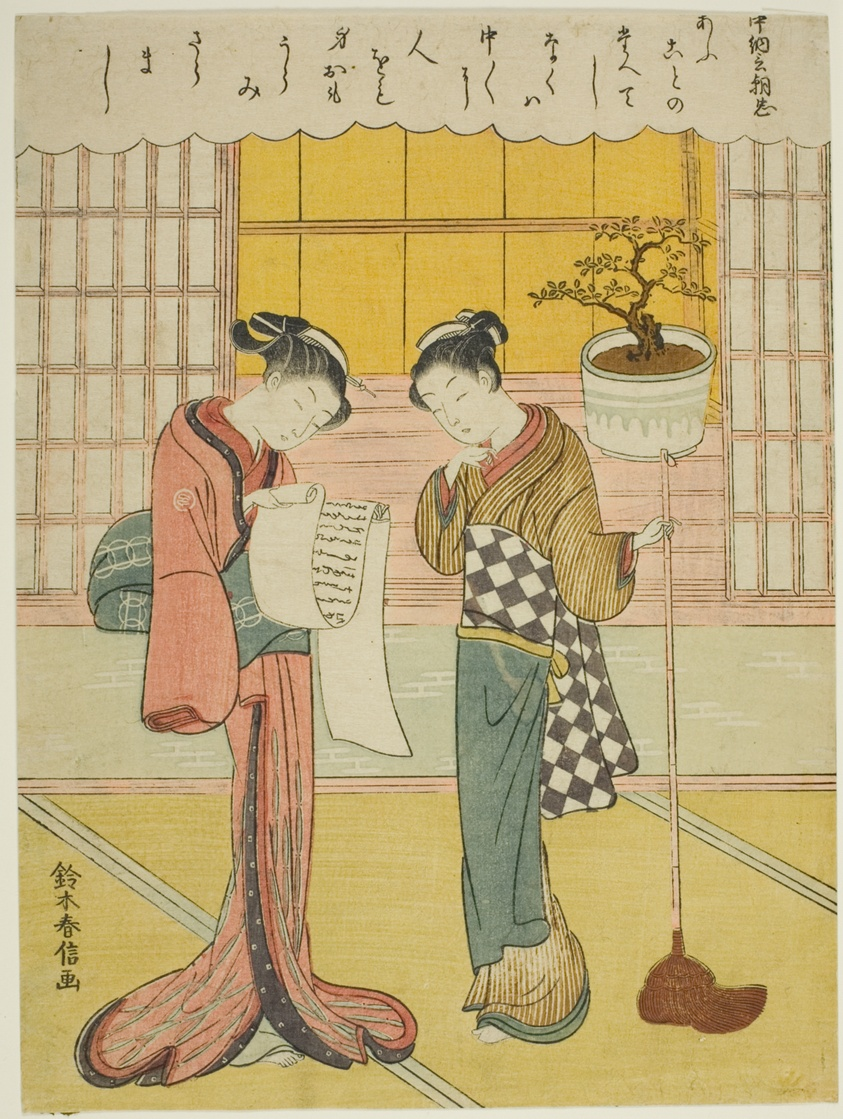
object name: Print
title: Poem by Chunagon Asatada, from an untitled series of Thirty-Six Immortal Poets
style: Japanese (culture or style)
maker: Suzuki Harunobu 鈴木 春信; Japanese, 1725 (?)-1770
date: c. 1767/68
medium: Color woodblock print; chuban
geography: Japan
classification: woodblock print; print; asian art